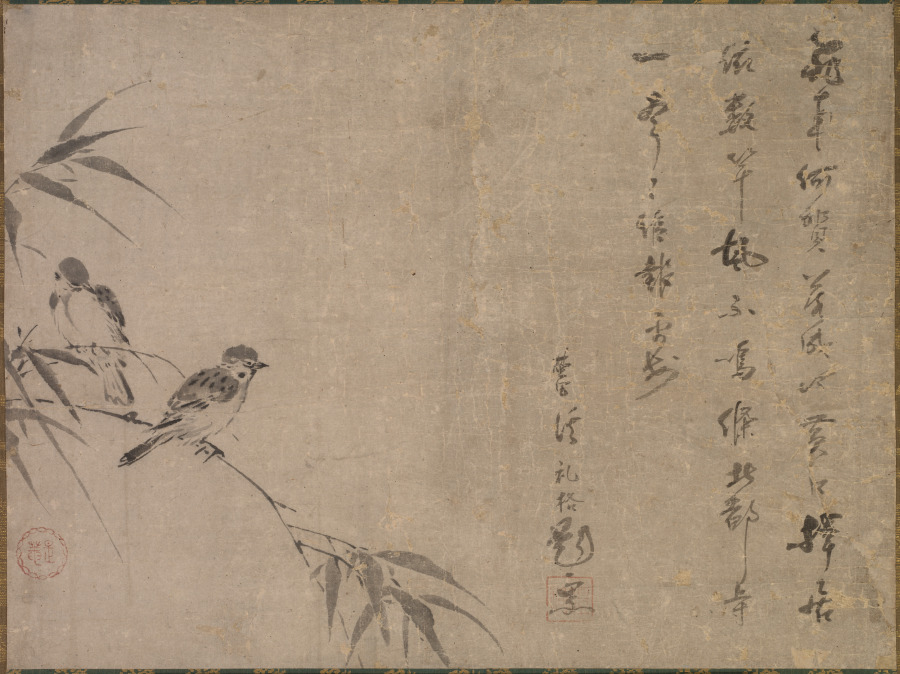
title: Sparrows and Bamboo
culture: Japan, Muromachi period (1392–1573)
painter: Shiken Saidō (Japanese, 1486–1581)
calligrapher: calligraphy by Ekkei Reikaku (Japanese, d. 1609)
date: mid- to late 1500s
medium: hanging scroll; ink on paper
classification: Painting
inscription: signed: Ekkei Reikaku daishi owaru inscription sealed: Reikaku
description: Shiken Saidō, whose style name was Ze'an, was a Zen monk who trained at Shōkokuji temple in Kyoto, and designed the garden of Reiun’in at Myōshinji temple. He painted landscapes in the style of painter and art advisor to the shogun, Sōami (died 1525), as well as bird-and-flower compositions. A poetic inscription by the monk Ekkei Reikaku accompanies this gentle composition of two sparrows perched on bamboo.